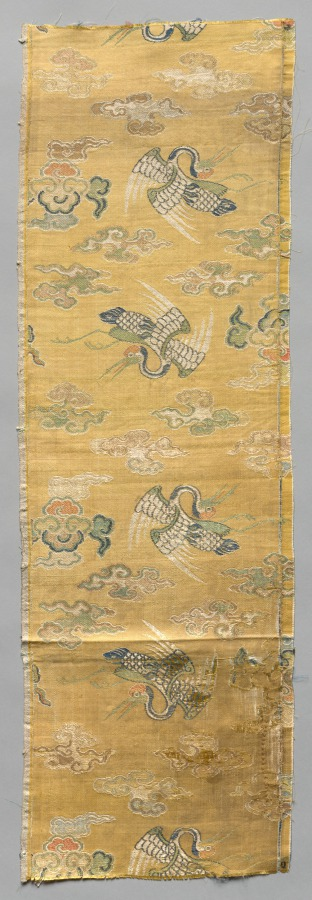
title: Fragment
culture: China, 18th century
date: 1700s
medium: satin ground; silk diasper weave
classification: Textile